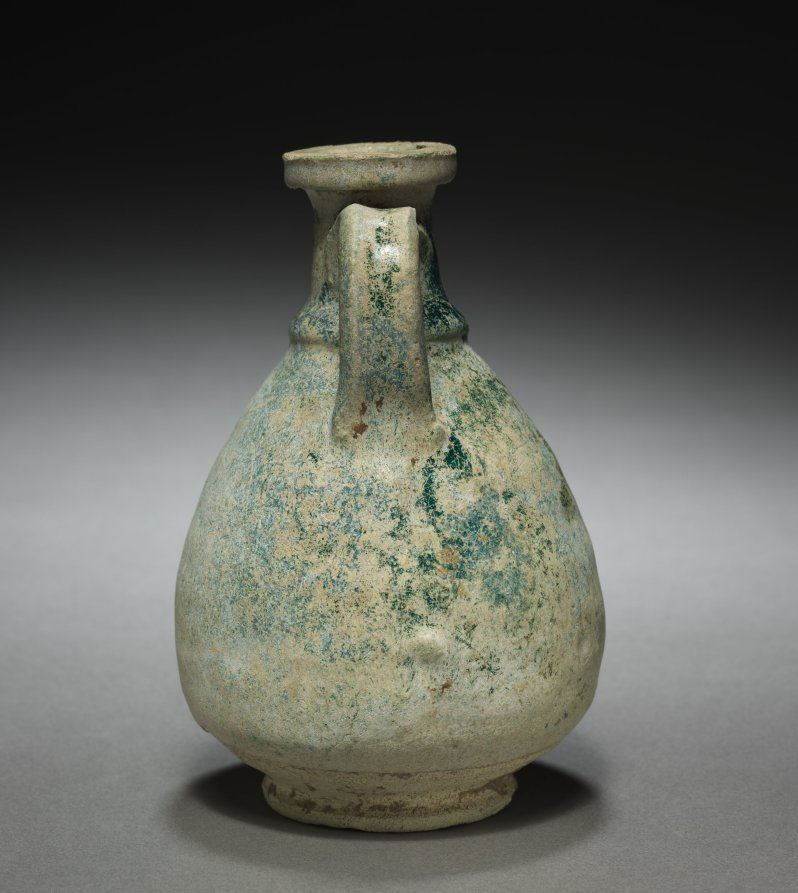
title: Jar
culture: Parthian Empire (247 BCE–224 CE)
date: 1–200 CE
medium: earthenware with weathered glaze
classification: Ceramic